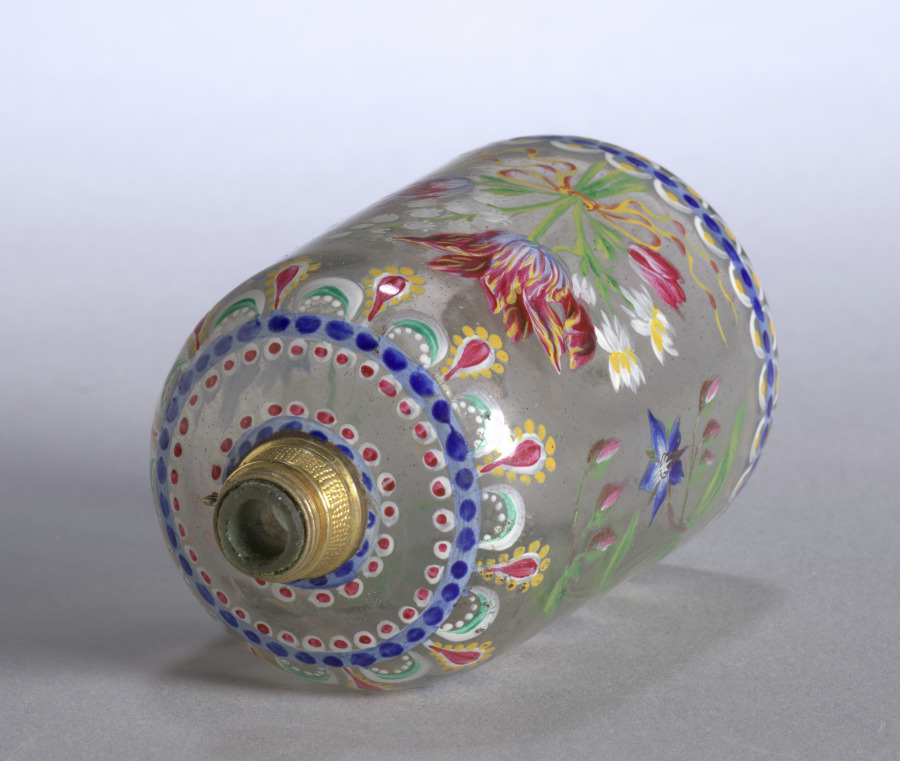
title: Scent Bottle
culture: Germany, 18th century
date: 1700s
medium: glass with enamel decoration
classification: Miscellaneous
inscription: signed: Z. F. a M.